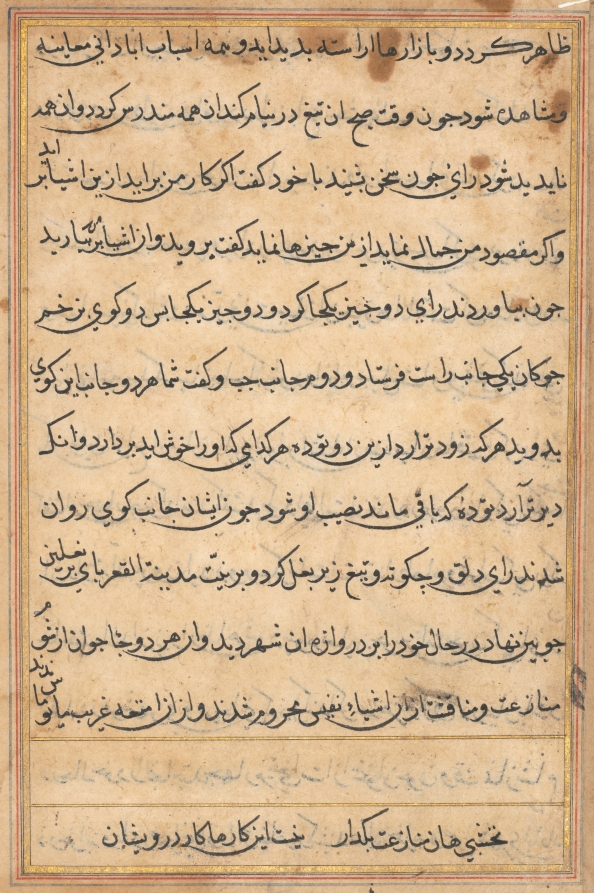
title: Page from Tales of a Parrot (Tuti-nama): text page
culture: Mughal India, court of Akbar (reigned 1556–1605)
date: c. 1560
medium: gum tempera, ink, and gold on paper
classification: Painting